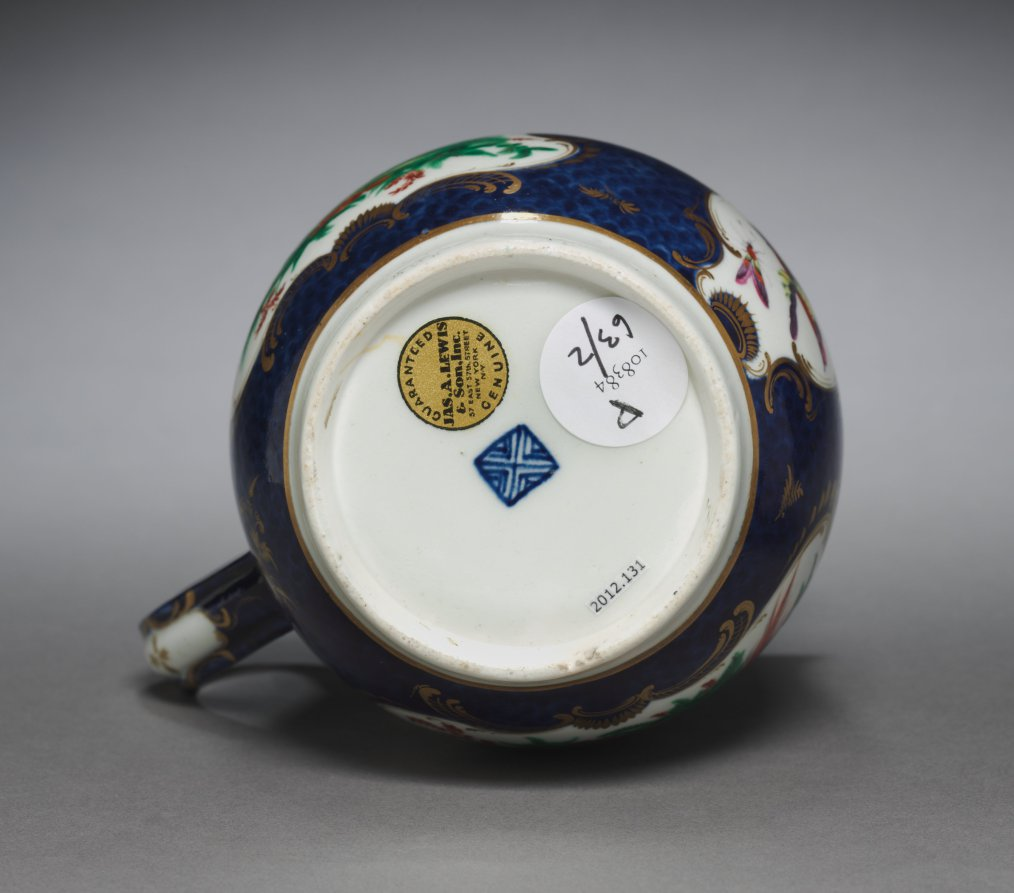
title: Tankard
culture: England, 18th century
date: c. 1770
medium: ceramic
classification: Ceramic